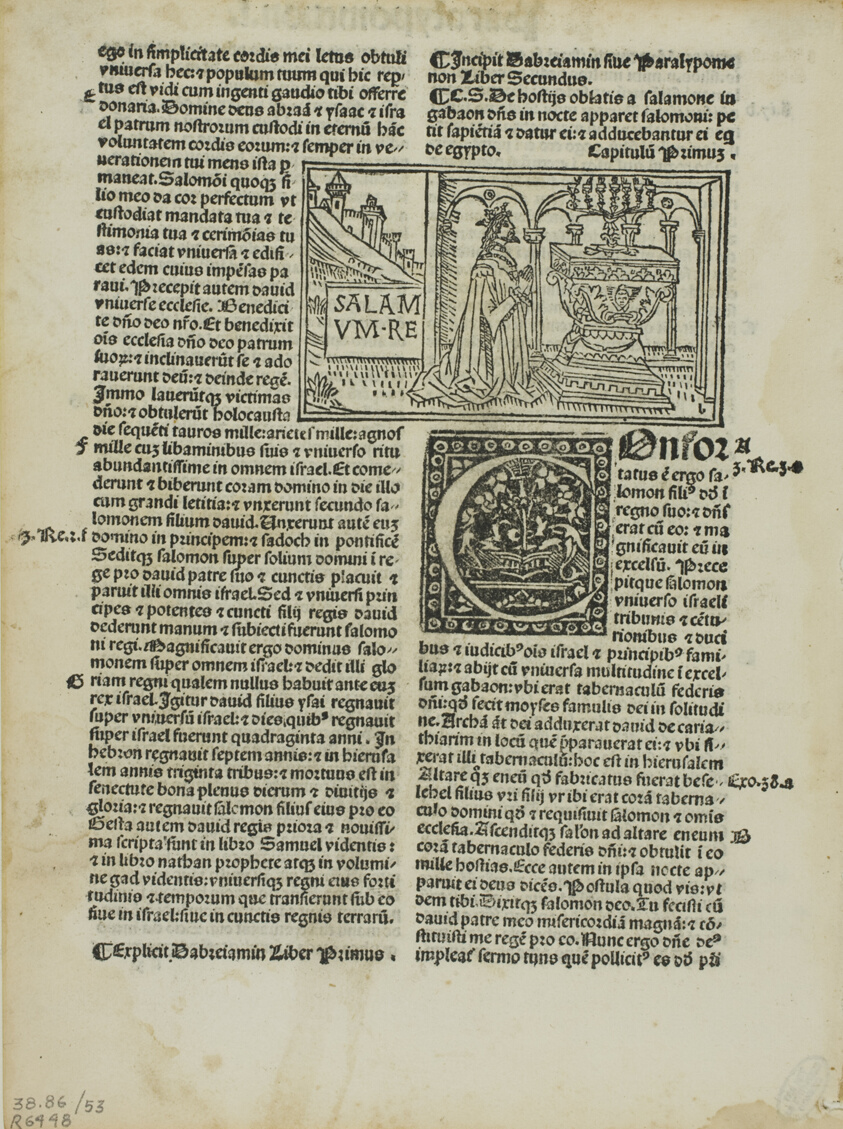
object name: Print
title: King Solomon in Prayer from Biblia cum tabula (also called Biblia Latina or Mallermi’s Bible), Plate 53 from Woodcuts from Books of the 15th Century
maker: Monogrammist b (Venice, late 15th century); printed and published by Simon Bevilacqua (Italian, active 1485-1518); original text translated by Nicolò Malermi (Italian, c. 1422–1481); portfolio text by Wilhelm Ludwig Schreiber (German, 1855–1932)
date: 1498, portfolio assembled 1929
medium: Woodcut in black, and letterpress in black (recto and verso), on cream laid paper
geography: Italy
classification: woodcut; print; prints and drawing